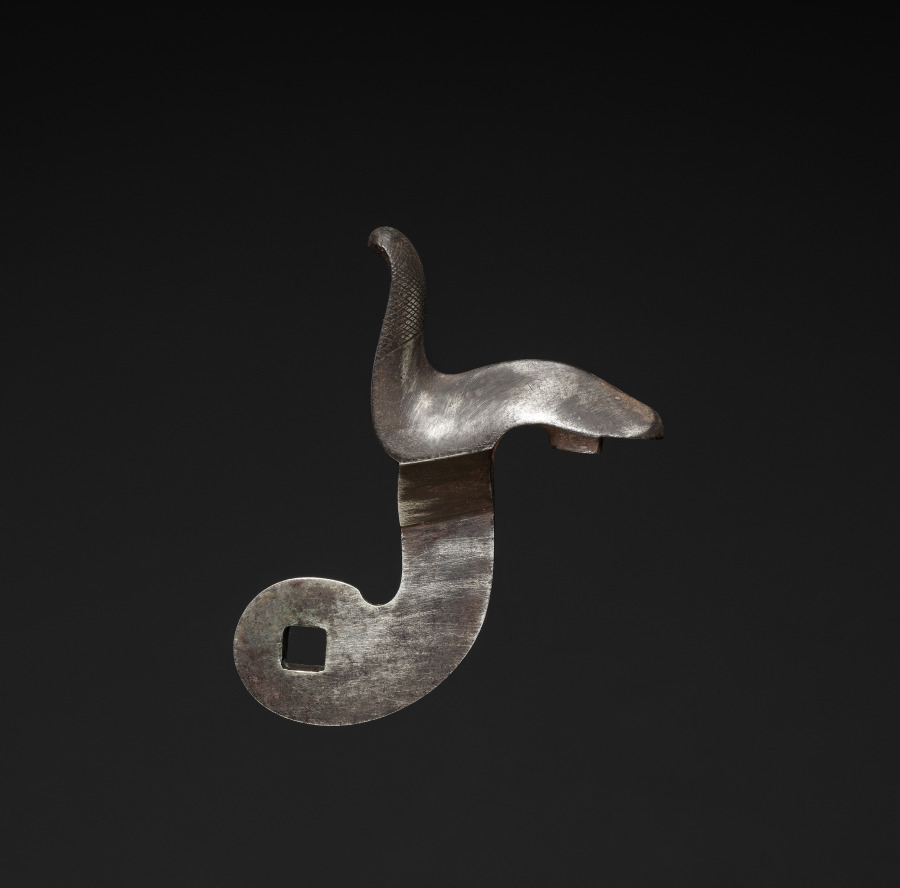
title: Gun-Lock Hammer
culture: England, early 19th century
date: c. 1800–1825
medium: steel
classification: Arms and Armor